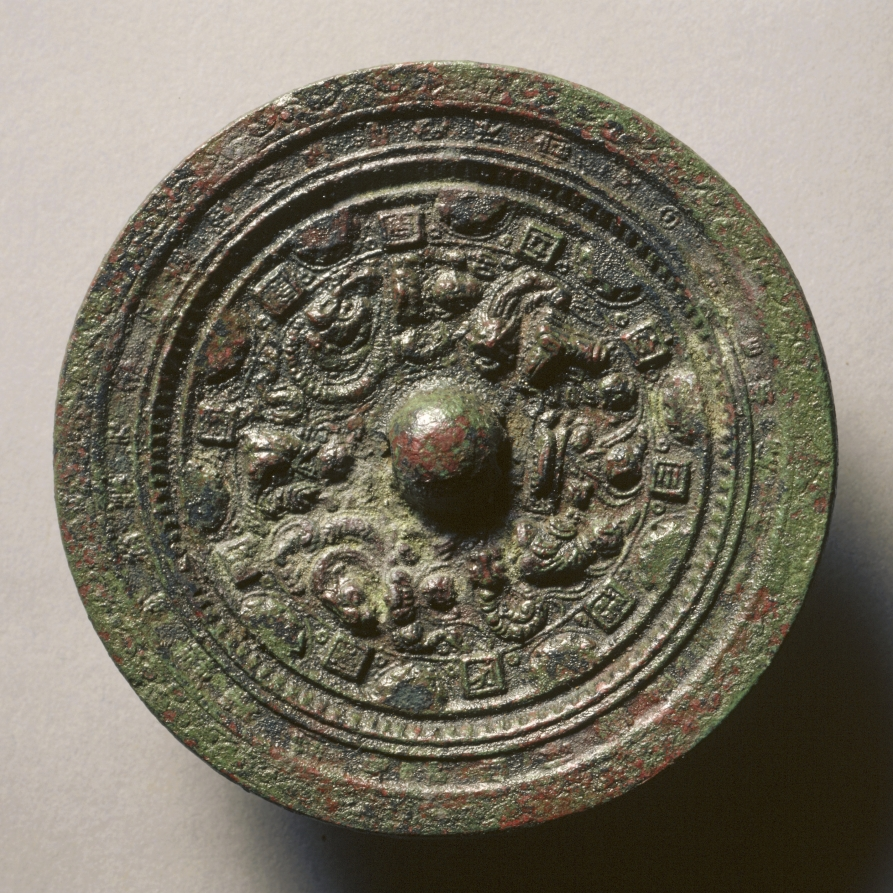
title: Mirror with Deities and Animals Surrounded by Rings of Squares and Semicircles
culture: China, Eastern Han dynasty (25–220 CE)(?)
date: early 100s–early 200s CE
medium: bronze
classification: Metalwork